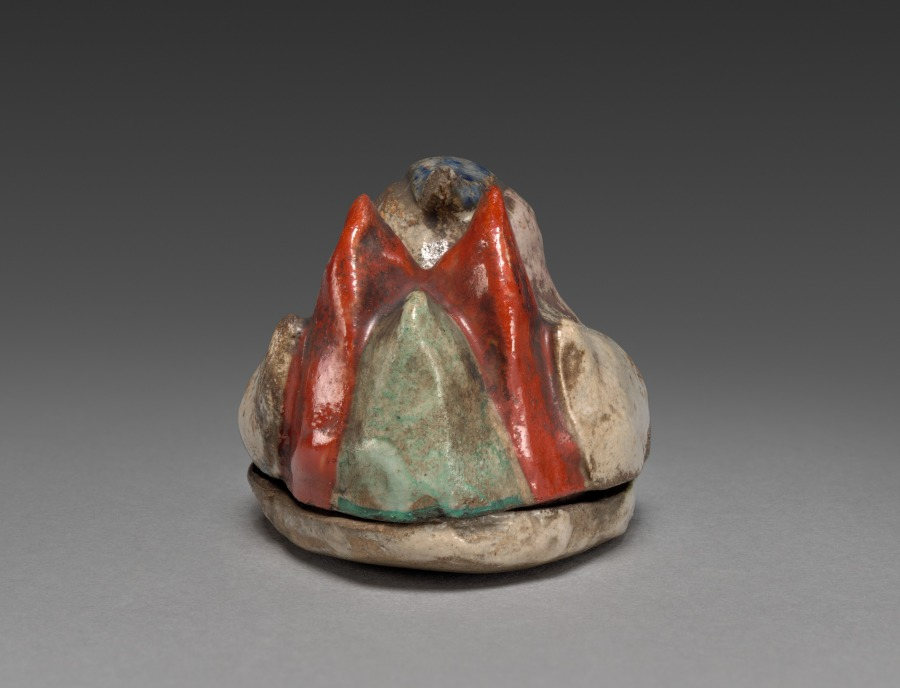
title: Incense Container (Kōgō) in the Shape of a Mandarin Duck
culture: Japan, Edo period (1615–1868)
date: c. 1700–1868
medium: Stoneware with glaze and incised decoration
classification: Ceramic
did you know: The artist incised the bird's feet on the bottom of the box.